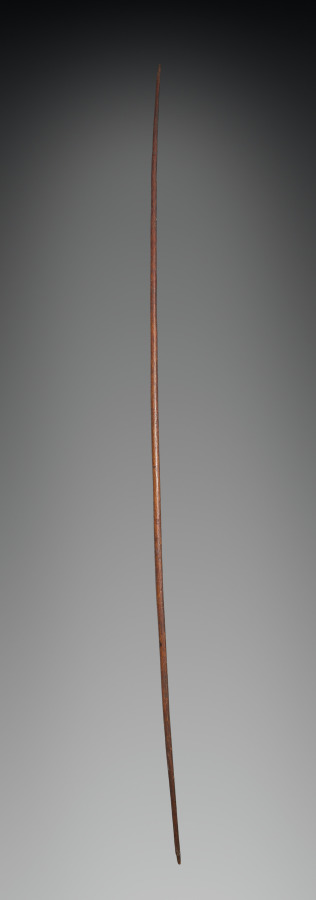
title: Bow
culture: Philippines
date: before 1922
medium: wood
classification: Arms and Armor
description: This long, slender bow is carved from a single piece of dark hardwood. It has a smooth, undecorated surface and a gentle natural curvature. Shallow grooves are cut into each end to secure a bowstring.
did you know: The Aeta (or Agta) people are the Indigenous population of the Philippines who follow a hunting and gathering lifestyle.